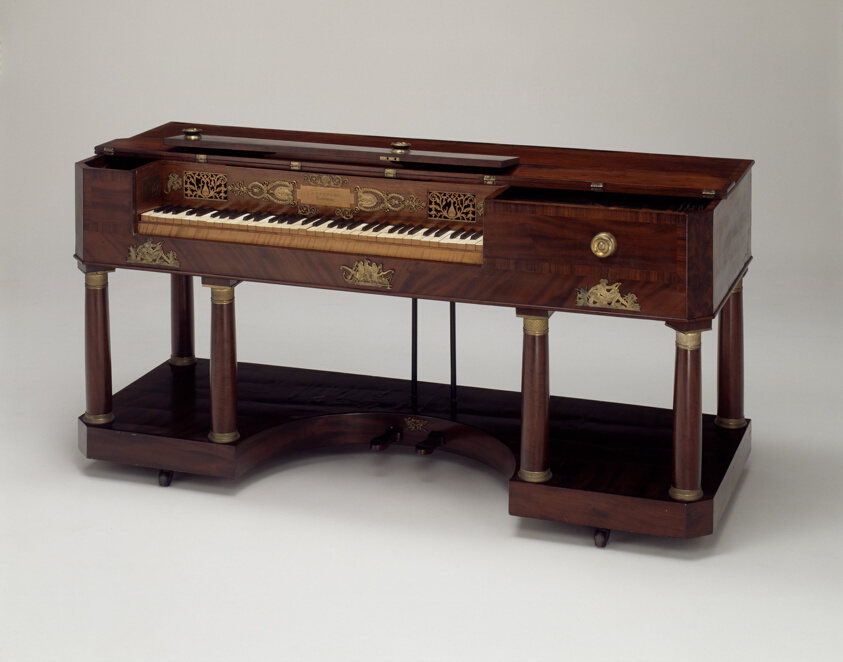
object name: Furniture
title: Pianoforte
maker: James Stewart; American, b. Scotland, active 1812–1826; Baltimore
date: 1818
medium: Mahogany, mahogany veneer, poplar, oak, ebony, ivory, ormolu, and brass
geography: Baltimore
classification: case furniture; furniture; american decorative arts; american arts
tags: furniture